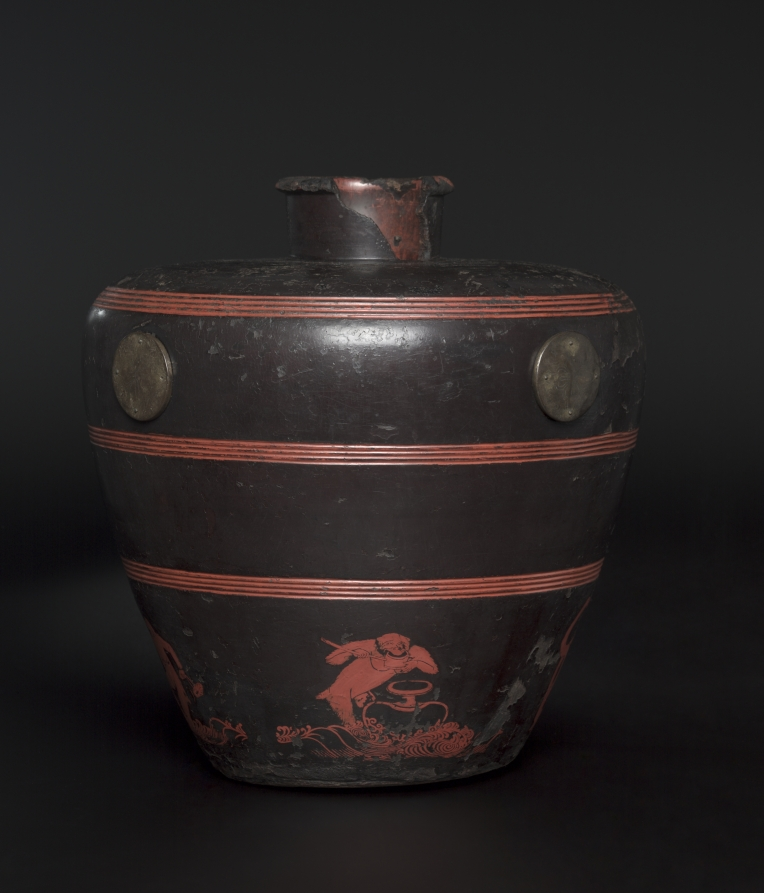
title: Jar with Scenes of Frolicking Xingxing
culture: Japan, Kamakura period (1185–1333)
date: 1302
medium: Zelkova wood, covered with hemp cloth and colored lacquer, and bronze-plated wood fittings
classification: Lacquer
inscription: Dated 1302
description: This jar features a design of a monkey-like animal ladling sake into his mouth from a vessel bobbing in waves, along with others trying on sandals and crossing a river. In the 1300s, Chinese literature was a powerful source of inspiration for artistic practice in Japan, and this scene was inspired by the exploits of the mythical xingxing, a beast of ancient Chinese lore for whom people left straw sandals and wine. The xingxing would then recite the names of the ancestors of those who had left them the gifts.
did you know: To make this vessel, a wooden form was covered with successive layers of lacquer, the clear sap of the highly toxic Rhus verniciflua tree.